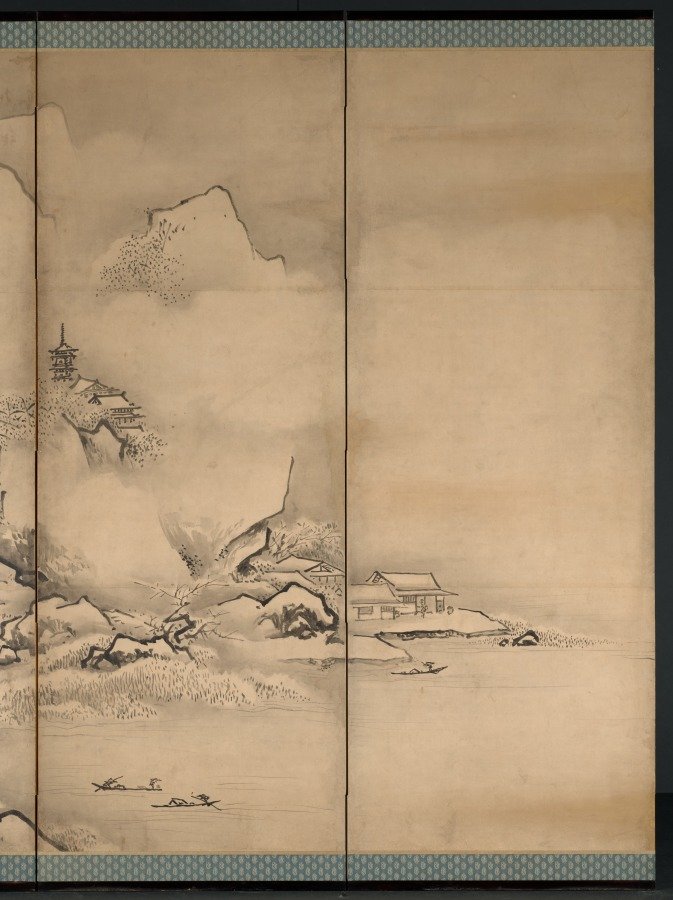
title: The Four Seasons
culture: Japan, Edo period (1615–1868)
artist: Kano Tan’yū (Japanese, 1602–1674)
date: 1668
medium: Six-panel folding screen, ink and slight color on paper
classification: Painting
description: Tan'yū's skills were honed early within the regimen of the Kano family's painting studio. His grandfather, Eitoku (1543–1590) was the Momoyama period's most sought-after painter, a champion of colorful, large-scale painting compositions who worked for several of the country's most powerful leaders. When the young Tan'yū was summoned to Edo in 1617 by the shogun to become a member of the new capital's official painting studio, few opportunities to work on similarly ambitious projects existed. Yet by the end of his career, Tan'yū had supervised the execution and installation of linked mural painting compositions in several of Japan's most prestigious residences and castles. As an official court painter to the first shogun, Tokugawa Ieyasu (reigned 1603–5), and then his successors, Tan'yū appears to have successfully juggled his official duties with private activities as a teacher, as the era's leading connoisseur of classic Chinese and Japanese painting, and as a practicing artist. His surviving compositions as well as thousands of sketches far surpass the oeuvre of any of his contemporaries. While studio assistants surely contributed to his oeuvre, just as later imitators consciously confused his accomplishments, a clearer image of the painter has emerged in recent years that better conforms with his contemporary acclaim as recorded in seventeenth- and eighteenth-century documents. Tan'yū can now be seen as an artist adept in virtually all traditional ink painting subject matter, which he often presented in novel interpretations. Equally important are his rare screen (byōbu) compositions executed in a pure yamato-e manner with vivid mineral pigments on a gold-foil background. This pair of byōbu presents Tan'yū's more orthodox approach to academic ink painting methods embracing Chinese themes that had been interpreted by numerous Japanese ink painters over the centuries. Thus a typical view of residences and human activities set along the shores of an impressive river (or lake) is enlivened by the Japanese proclivity for including seasonal references. Proceeding from right to left, the viewer passes sequentially from spring to the snow-laden branches of winter. Tan'yū lends considerable atmospherics to the panorama in his use of misty cloud banks, frequently set off by sharp, darkened ink lines or whole areas of ink washes of variegated tonalities. The spring and summer views are particularly notable in this regard, as is the presence of the artist's signature on both byōbu, attesting to their completion in Tan'yū's sixty-seventh year (1668)—50 years after he left Kyoto for the capital, and 30 years following his adoption of the artist name "Tan'yū" (in 1635). From 1622, when he began work on the mural paintings for Edo castle (the shogun's formal residence), through the completion of the painting cycle in 1636 for the Tokugawa family mausoleum in Nikkō to the north of Edo, Tan'yū's skills as head of an accomplished painting studio as well as a master painter found their most impressive expression in large-scale compositions. In 1638 he received the honorary Buddhist title Hōgen (Eye of the Law). It is intriguing therefore that relatively few independent byøbu paintings from the master's hand survive, particularly documented early works.